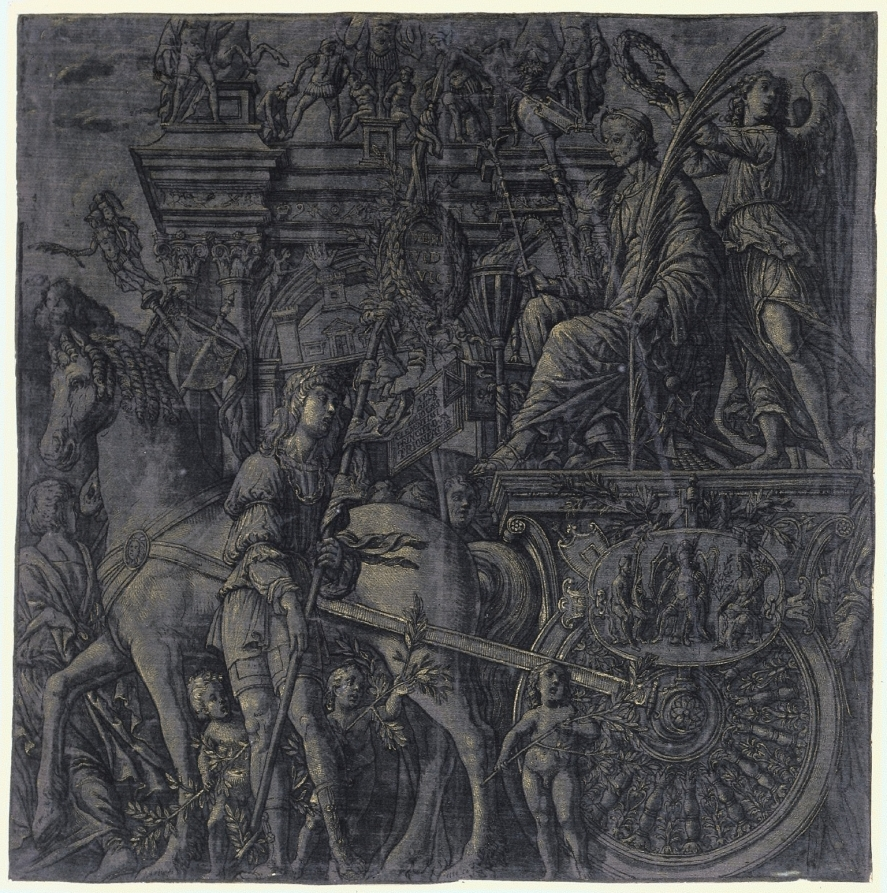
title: The Triumph of Julius Caesar: Caesar Triumphant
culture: Italy, 16th century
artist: Andrea Andreani (Italian, about 1558–1610)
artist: after Andrea Mantegna (Italian, about 1431–1506)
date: 1593–99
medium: woodcut printed on silk, heightened by hand with gold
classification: Print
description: Commissioned by Duke Vincenzo Gonzaga, this series of chiaroscuro woodcuts reproduces Andrea Mantegna’s Triumph of Julius Caesar, painted a century earlier. The scenes imaginatively portray the triumphal procession of the renowned Roman general and consul Julius Caesar following his successful defeat of Gaul in 52 BC. Each section of the continuous frieze shows elements typical of these parades, sanctioned by the Roman Senate and described in ancient texts. The printed suite’s frontispiece features a portrait bust of Mantegna, and the text below boasts that the famous paintings attracted many viewers. People who owned sets of these woodcuts often tacked them up to create a decorative frieze. Andreani issued the prints with a sheet of classical columns that could be cut out and placed between the scenes. Two fragments of these columns, colored orange, still flank the fourth scene. This special impression of the final woodcut in Andreani’s Triumph of Julius Caesar was printed on dyed silk. The gold highlights, added by hand, make Caesar in his triumphal car appear especially luxurious. In their descriptions of Roman triumphs, the ancient chroniclers Plutarch and Appian each wrote that the hero of honor wore purple robes decorated with gold.